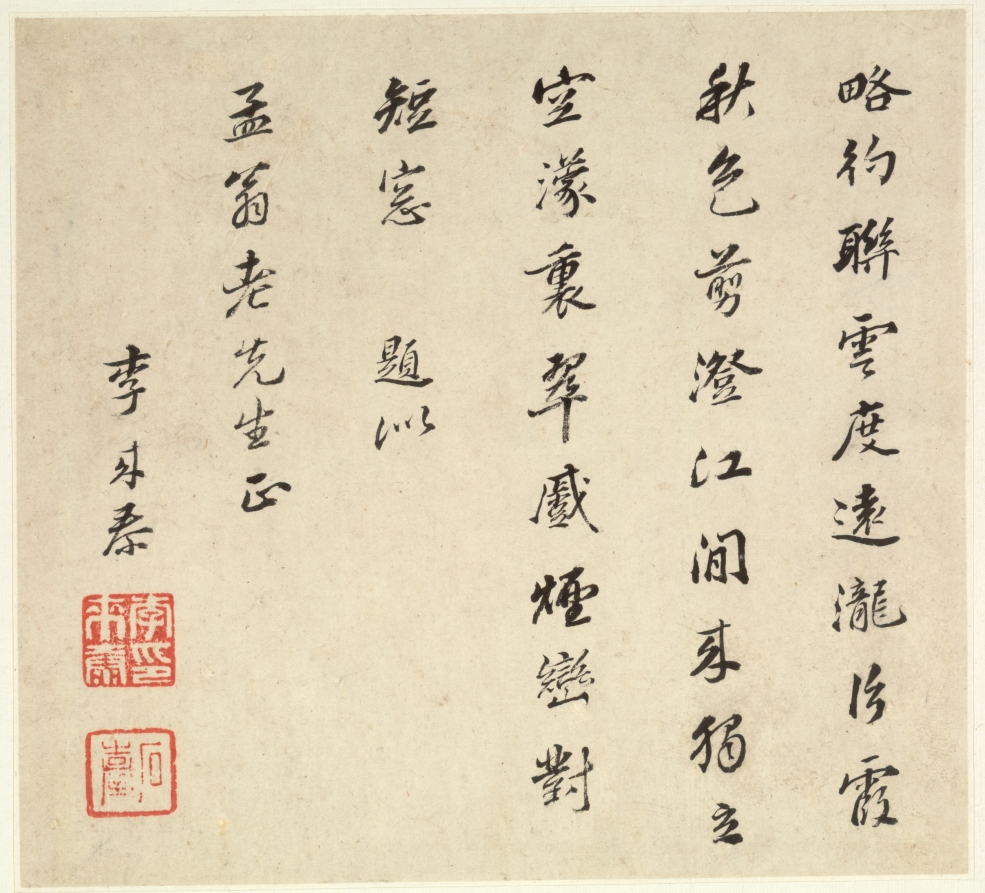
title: Album of Landscapes: Leaf 3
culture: China, Qing dynasty (1644-1911)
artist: Wang Gai (Chinese, active c. 1677–1705)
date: 1677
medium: album leaf, ink and light color on paper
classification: Painting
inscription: Poem by Li Lai-t'ai